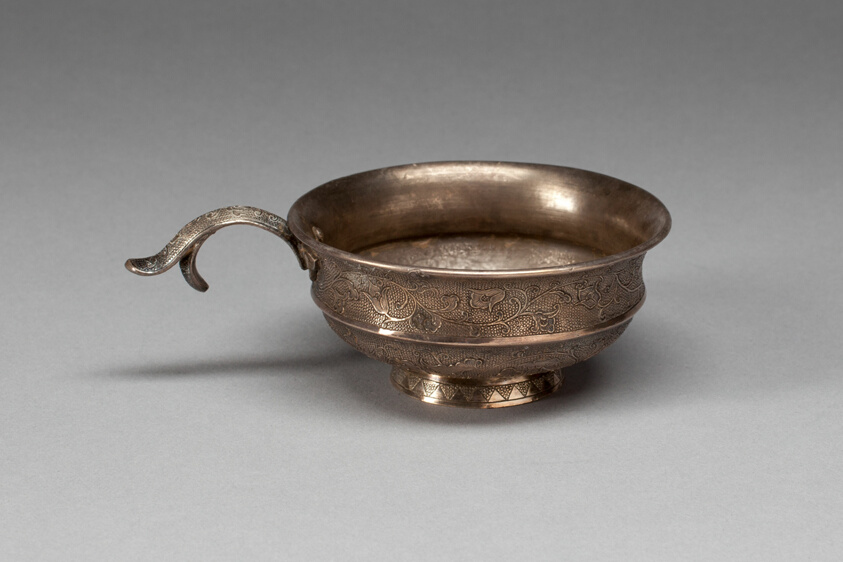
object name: Decorative Arts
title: Handled Cup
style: Chinese (culture or style)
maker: China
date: Tang dynasty (618–907), about 675–750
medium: Silver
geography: China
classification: drinking vessel; silver; metalwork; asian art; decorative arts